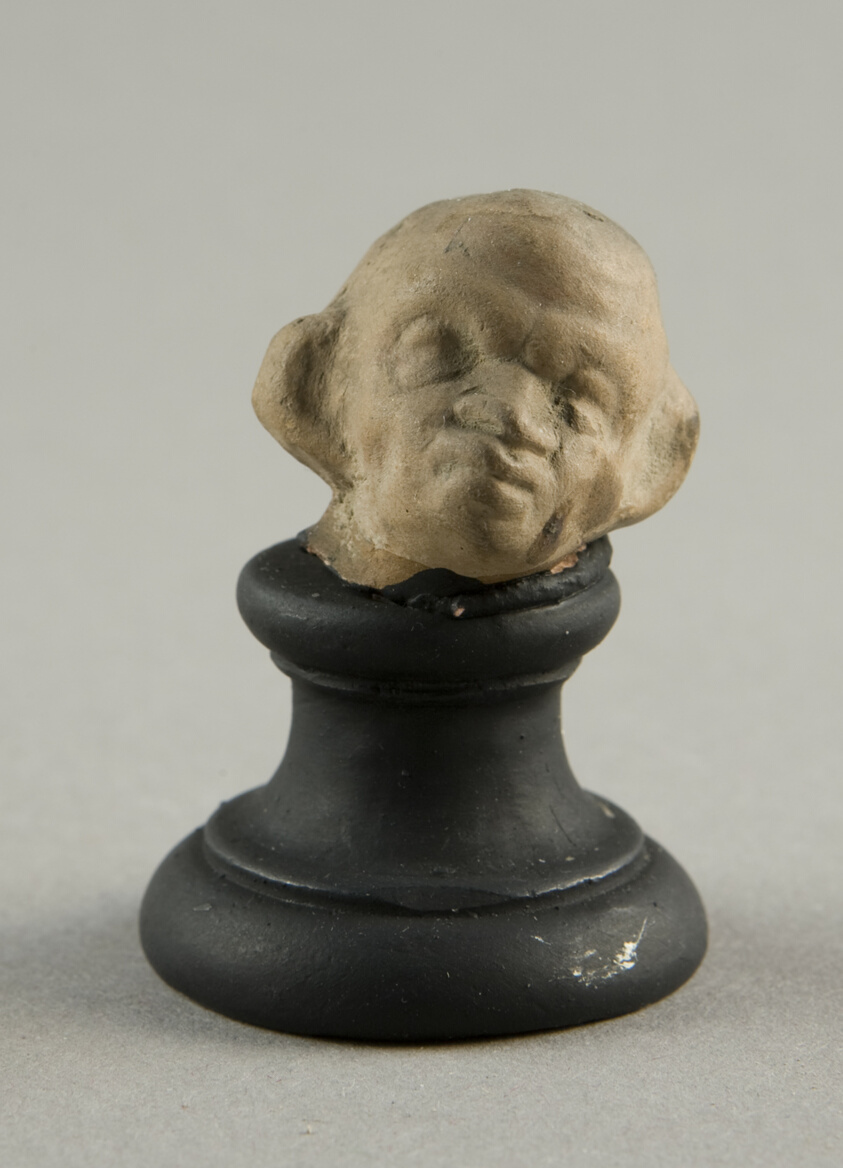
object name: Sculpture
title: Head of a Grotesque Wearing Wreath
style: greek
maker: Greek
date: 2nd-1st century BCE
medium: terracotta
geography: Greece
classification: earthenware; ceramics; sculpture; ancient art